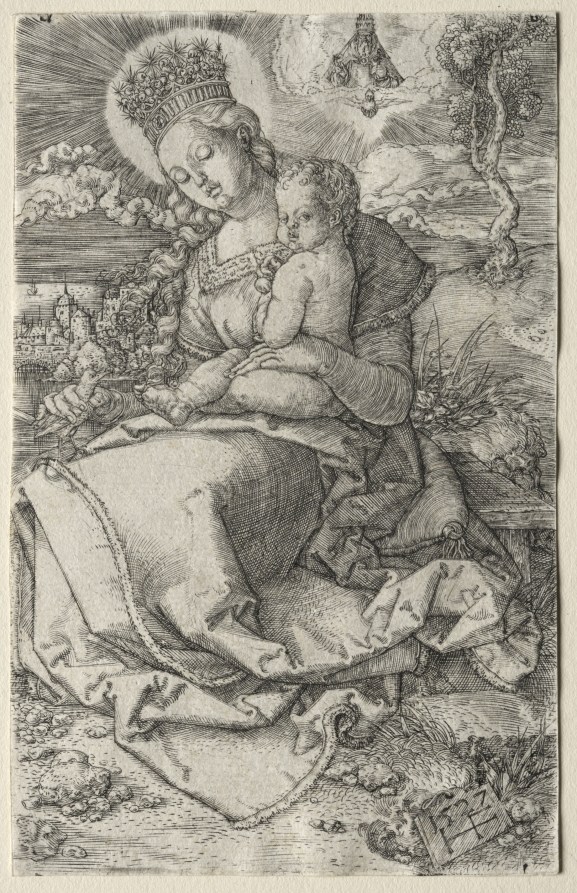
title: Virgin with a Crown of Stars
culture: Germany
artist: Monogrammist HF (German, active about 1527)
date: 1527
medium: engraving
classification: Print